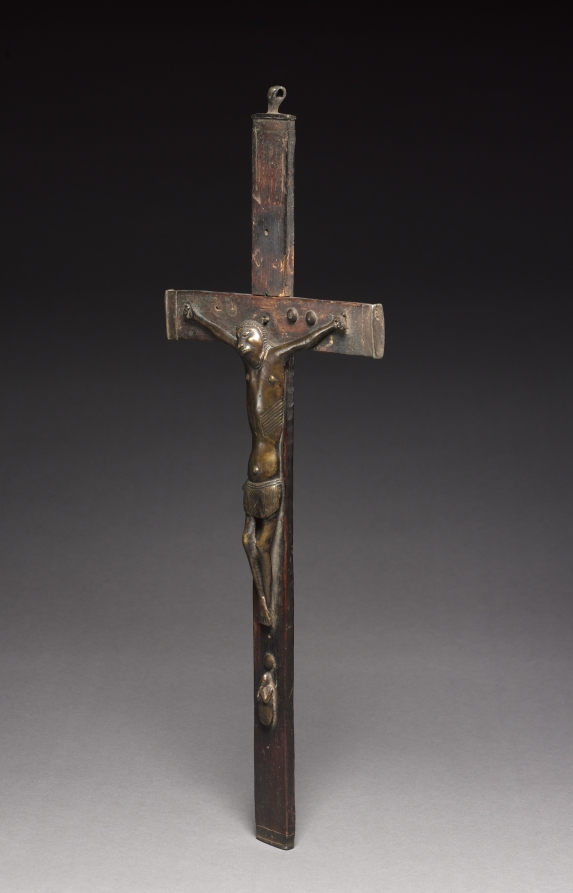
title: Crucifix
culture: Africa, Central Africa, Kongo Kingdom, Kongo-style maker(s)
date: late 1800s-early 1900s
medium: Copper alloy, wood, upholstery studs, and iron alloy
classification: Sculpture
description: An artist made this crucifix from wood and metal centuries after Catholicism became the Kongo Kingdom’s official faith. Following King Nzinga a Nkuwu's 1491 decision to convert, Kongo Christianity uniquely reflected its surroundings. While early Christ images arrived from Portugal and Italy, this later local example has braids like a Kongo man. Worn smooth by repeated touch, the lower figure is the Virgin Mary or a worshiper knelt in mourning or respect. The x-shape incised into his waist wrapper references the dikenga dia Kongo. This likely pre-Christian symbol diagrams the life cycle's four points.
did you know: This x-shapes of the cross and on Christ's wrapper are forms with symbolic meaning tied to the life cycle in both Catholicism and in the indigenous Kongo religion.